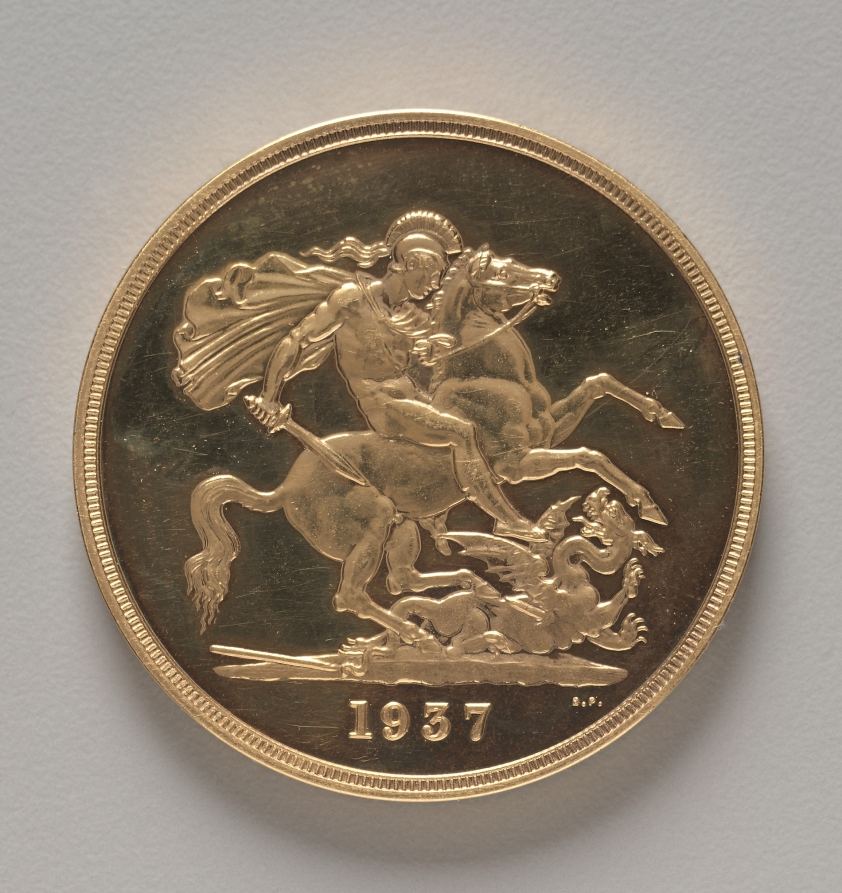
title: Five Pound Piece: St. George and the Dragon (reverse)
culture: England, George VI, 1936-1952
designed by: after Benedetto Pistrucci (Italian, 1784–1855)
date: 1937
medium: gold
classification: Coins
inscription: below: 1937.